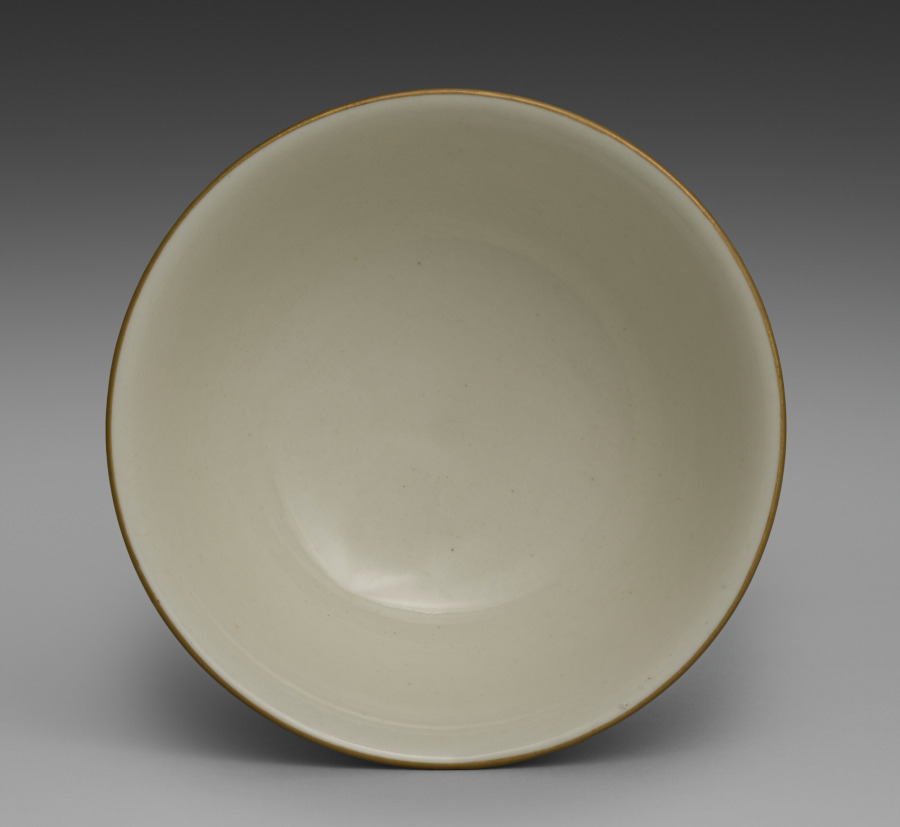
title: Bowl from Dining Set with Plum Blossoms and Cracked-Ice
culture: Japan, Meiji period (1868–1912)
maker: Seifū Yohei II (Japanese, 1844–1878)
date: c. 1875–78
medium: Porcelain with molded designs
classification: Ceramic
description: Each item in this set has a delicate low-relief design of flowering plum branches over scattered, intersecting lines meant to resemble the cracked-ice surface of a frozen body of water and is signed on the base in gold pigment. While Yohei II produced many fine works in underglaze blue, like those produced by Kiyomizu Shichibei, he also made works in quite different styles later in his career, from the early 1870 s. In 1873, he was appointed purveyor to the Industrial Center of Kyoto Prefecture, a designation associated with Kyoto’s efforts to reach an international market through the port of Kobe; and from 1875 until his death, he was involved in national-level projects to present Japanese ceramics across the world. It was during this period that Yohei III was apprenticed to Yohei II, and it has been suggested that this set may in fact be an early example of Yohei III’s work, which he signed with his teacher’s name. Decorated with flowers resembling Japanese textile motifs, the set calls to mind the design of Yohei II’s pair of vases with plum blossoms in the Victoria and Albert Museum. Here, the elaborate trees created for a formal public exhibition setting have been translated into the approachable blossoms of the genteel domestic environment. While the designs are consistent across the pieces, each raised flower petal and pistil and each incised line in the ice was done by hand, so the cups, bowls, and dishes are similar yet unique. The bottoms of two boxes once identified the set’s owner, but the information has been deliberately obscured with black ink. However, inscriptions still visible appear to indicate two occasions, once at the end of July 1886 , and once again in June 1916 , when parts of the set were requested from Hokura in Niigata Prefecture. The location corresponds to a neighborhood in the present-day city of Jōetsu. The surname Tsuji 辻 also appears on a paper tag affixed to one of the box cloths. Future research may possibly reveal more about their provenance. A vase by Yohei III in a private collection combines the formal grandeur of the Yohei II vases in the Victoria and Albert Museum with the gentler design of this dining set, placing flowering plum trees against soft, scalloped-edge clouds resembling those in golden screens.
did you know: The dining wares have a creamy white coloration that the four boxes containing them identify as Korean in style.